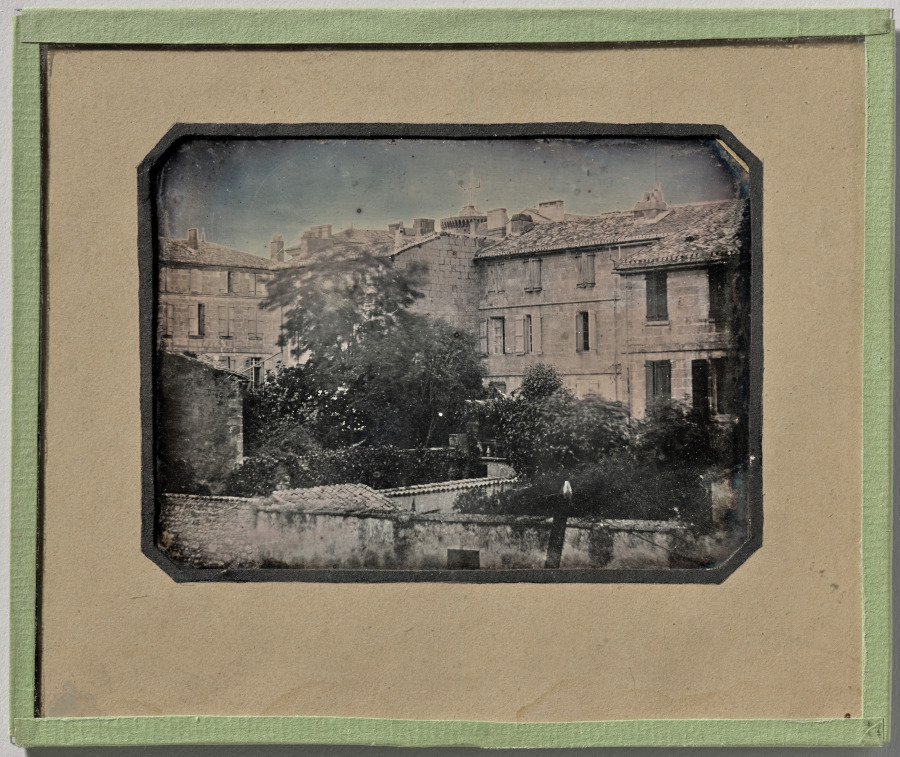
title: View of Angoulême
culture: France, 19th century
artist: Paul Michel Hossard (French, 1787–1862)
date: c. 1844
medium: daguerreotype, applied color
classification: Photograph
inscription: Written in pencil on verso: "HOSSARD"; Angoulême"; [additional writing in pencil is faded and unclear]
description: Paul Michel Hossard was an amateur daguerreotypist, especially noted for his architectural views. Rather than depicting a famous monument or landmark, this informal composition captures the charm of courtyards and houses in a small city in western France. The dominant horizontal lines of the buildings are contrasted with the soft, organic forms of the foliage. The presence of a breeze is suggested by the slight blurring of the tallest trees—the result of the long exposure time needed to make this image.